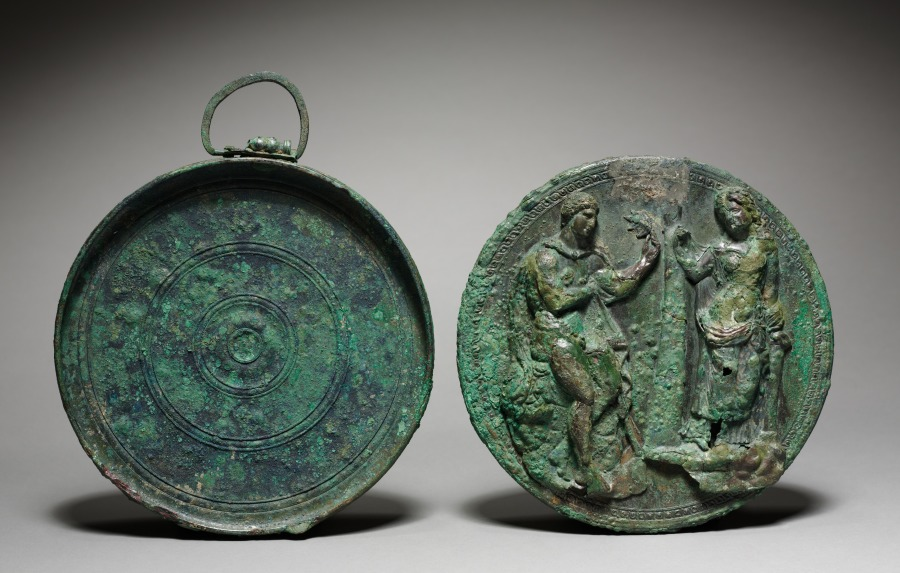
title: Mirror Case with Cover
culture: Greece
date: 300s BCE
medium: bronze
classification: Metalwork